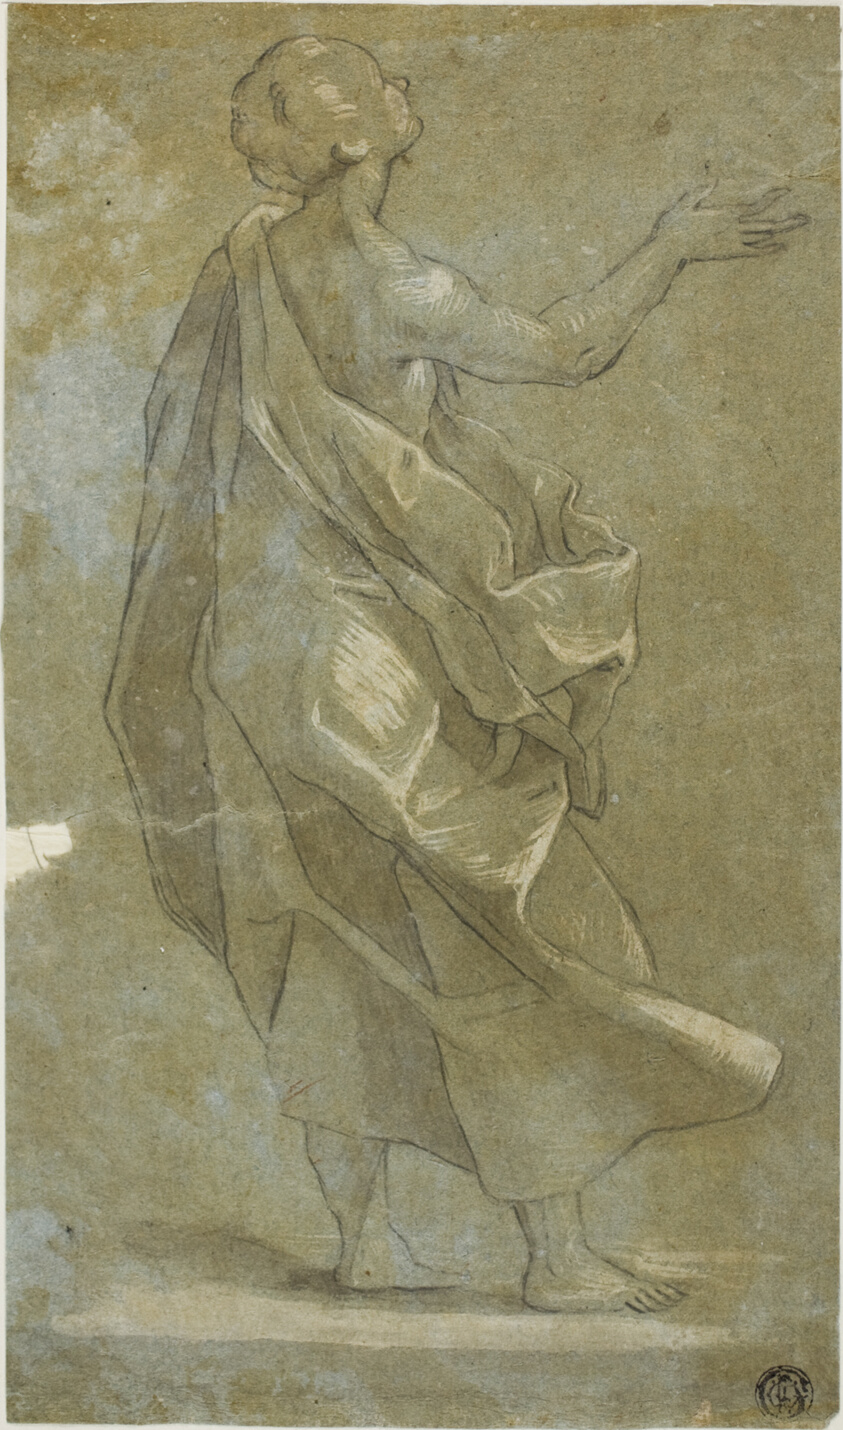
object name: Drawing and Watercolor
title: Standing Draped Male Figure with Raised Right Arm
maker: After Carlo Urbino; Italian, active 1553-1585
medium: Black chalk, with brush and brown wash, heightened with white gouache, on blue laid paper, tipped onto cream card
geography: Italy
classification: chalk with wash; drawings (visual works); prints and drawing